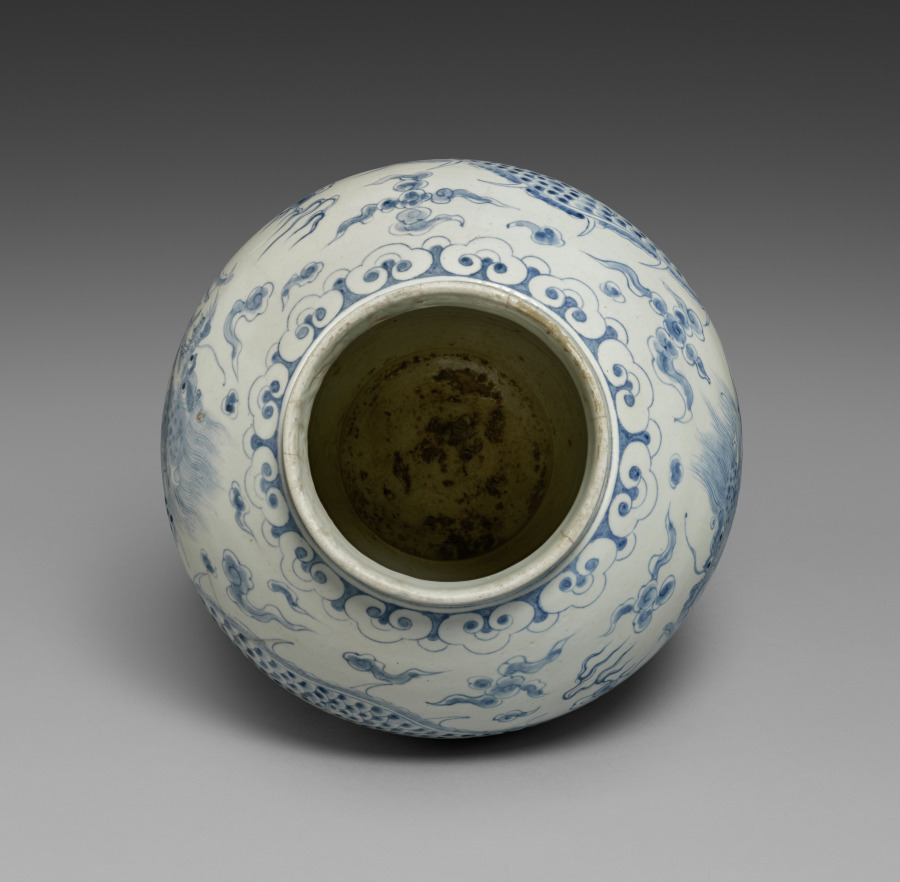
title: Jar with Dragon Design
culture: Korea, Joseon dynasty (1392–1910)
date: 1700s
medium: porcelain with underglaze blue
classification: Ceramic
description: As a mythical creature believed to make rain, the dragon served as a symbol of rulers in premodern East Asia. Here, a cobalt blue dragon is depicted flying through clouds to catch a flaming, wish-granting jewel called a cintamani. In the royal court, the shorter type of dragon jar held wine, while the tall type, like this one, held flowers. This porcelain once belonged to Robert W. Moore, who developed an interest in Korean art while serving in the US Army in South Korea during the 1950s and 1960s. Later, the CMA acquired this important work through an auction sale in 1986.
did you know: A mythical creature believed to have the power to make rain, the dragon is a prominent symbol of rulers in premodern East Asia; the image of dragons was used exclusively for the king's paraphernalia.